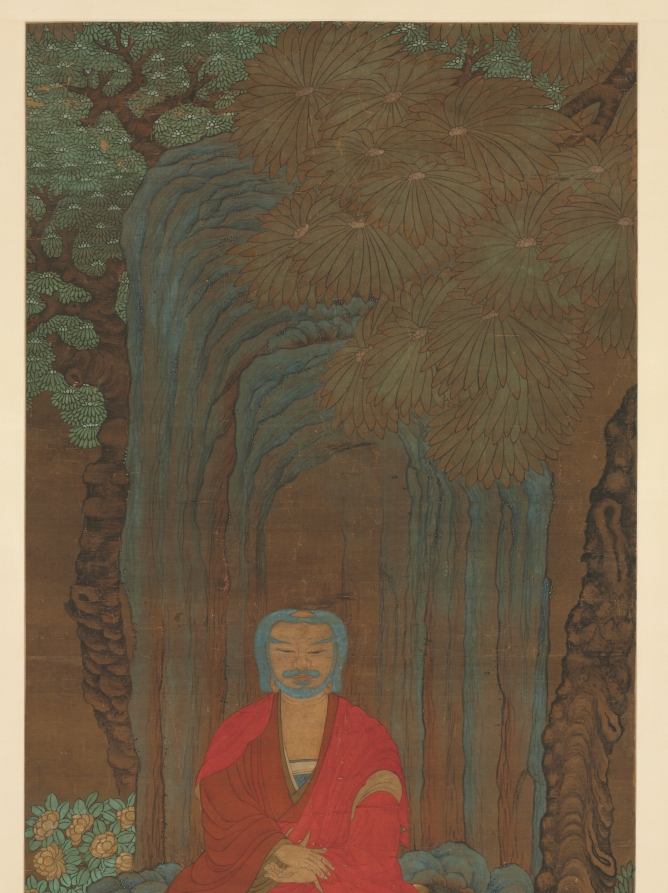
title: Shakyamuni under the Bodhi Tree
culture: China, Ming dynasty (1368–1644)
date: 1600–1650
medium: hanging scroll; ink and color on silk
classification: Painting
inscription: Artist's seal(?): Ta-fang-chih. 1 additional seal of Chiao Ping (dates unknown)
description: The historical Buddha Shakyamuni is seated in meditative posture upon the backs of three demons under the bodhi tree, where he achieved enlightenment. All three demons have horns like devils, and two have green skin. While they accommodate the Buddha, his weight seems to keep them under control. Since the Buddha’s hands do not conform to any accepted gesture, the specific religious event portrayed is unclear.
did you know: The blue-green style and grotesque goblins suggest an otherworldly sphere.